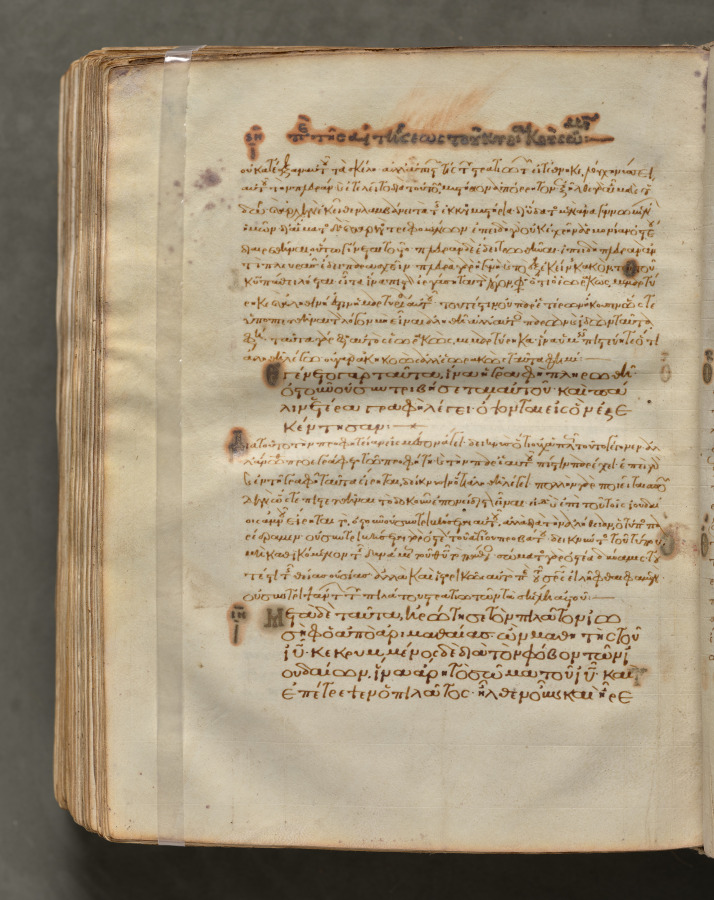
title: Text, folio 416 (verso), from a Gospel Book with Commentaries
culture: Byzantium, Constantinople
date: c. 1000–1100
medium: ink, tempera, and gold on vellum; leather binding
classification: Bound Volume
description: Each of the four gospels in this book opens on a page with brilliantly illuminated borders depicting the author of the text as well as birds—principally peacocks, symbols of the immortality of the soul—and fountains, representing the fountain of life and the salvation of the soul. This volume consists of 428 leaves with texts in Greek. Its level of sophistication suggests that it was probably written and decorated in a monastery in Constantinople.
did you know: Gospel books were carried in procession through Byzantine churches.